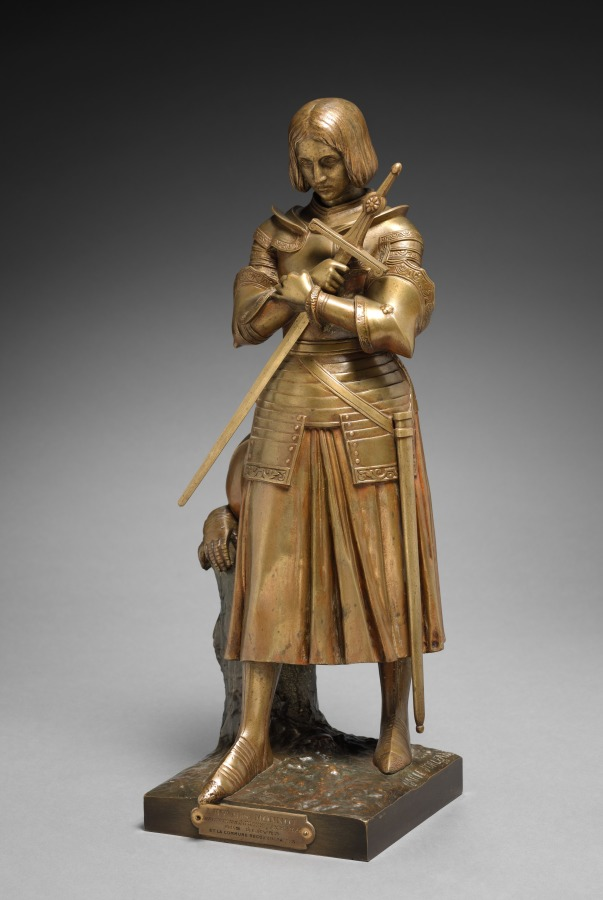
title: St. Joan of Arc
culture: France, 19th century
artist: Princesse Marie-Christine d' Orleans (French, 1813–1839)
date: 1836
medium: bronze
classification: Sculpture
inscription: Signed on top of base: "Marie d'Orléans."; inscribed on left side of base: "Susse Fres Edts Paris."